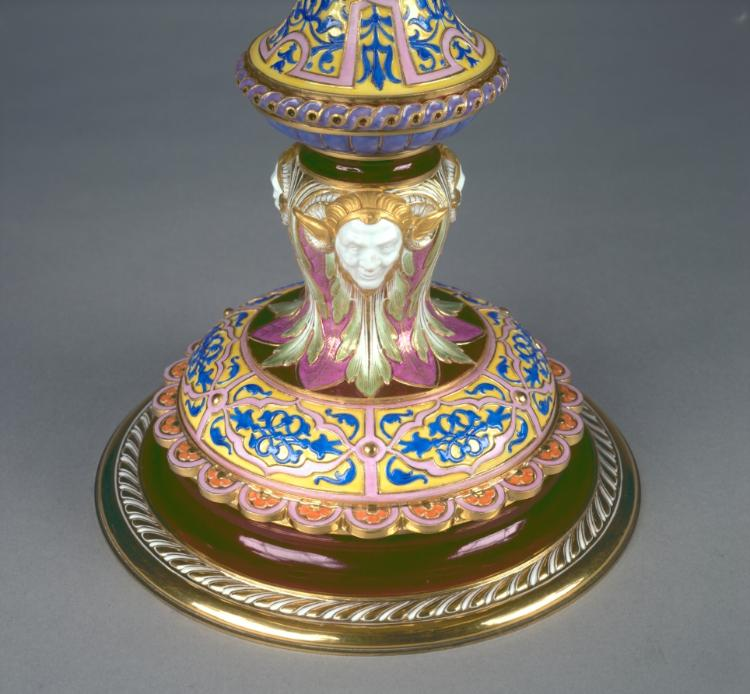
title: Standing Cup and Cover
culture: France, Sèvres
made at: Sèvres Porcelain Factory (French, est. 1756)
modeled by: Hyacinthe-Jean Regnier (French, 1803–1870)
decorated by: Francois-Hubert Barbin (French, 1786-)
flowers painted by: Jacques-Nicolas Sinsson (French)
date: 1844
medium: porcelain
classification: Ceramic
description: The official French porcelain factory at Sèvres has always been one of Europe's most important ceramic manufacturers, famous for its decorative pieces as well as more utilitarian wares. This vase in the Renaissance style, its design inspired by 16th-century French examples, is clearly in the tradition of elaborately conceived and decorated pieces intended for use by the French court or as presentation pieces by its monarchs. The latter was the fate of this Covered Cup, acquired in 1846 by Queen Marie-Amélie d'Orleans, the wife of Louis-Philippe, king during the July Monarchy (1830-48). Soon thereafter the vase was presented to a now unknown person. It is one of four pieces of this design made at the Sèvres factory, and the only one known today to have survived.